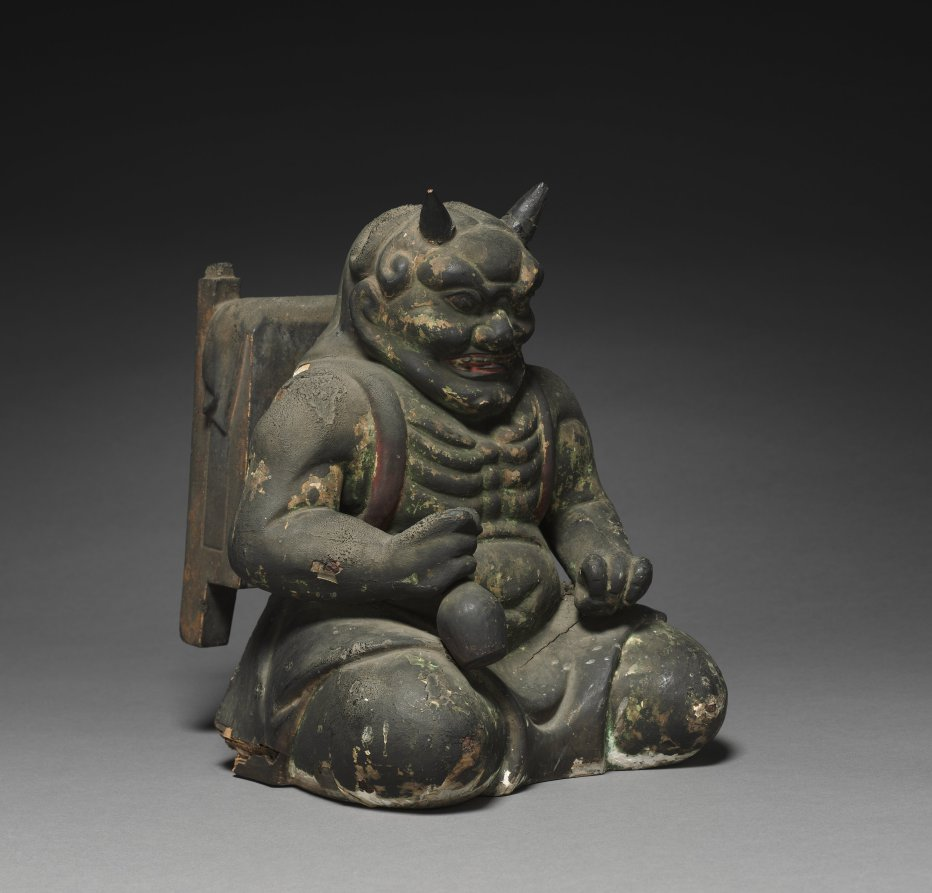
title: Seated Koki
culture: Japan, Muromachi period (1392–1573)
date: 1400s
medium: wood with pigment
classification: Sculpture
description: The axe-wielding red Zenki, and the vase-holding, bamboo backpack-wearing green Koki are both under the mystical control of the monk, En no Ozunu (legendarily 634–701), also known as En no Gyōja, or “En the Ascetic,” considered to have founded Shugendō, a style of religious practice focused on performing austerities in mountainous settings.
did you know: This sculpture was hand-carved and covered with gesso, then paint in green, white, red, yellow, orange, and black, and gilded in select areas.